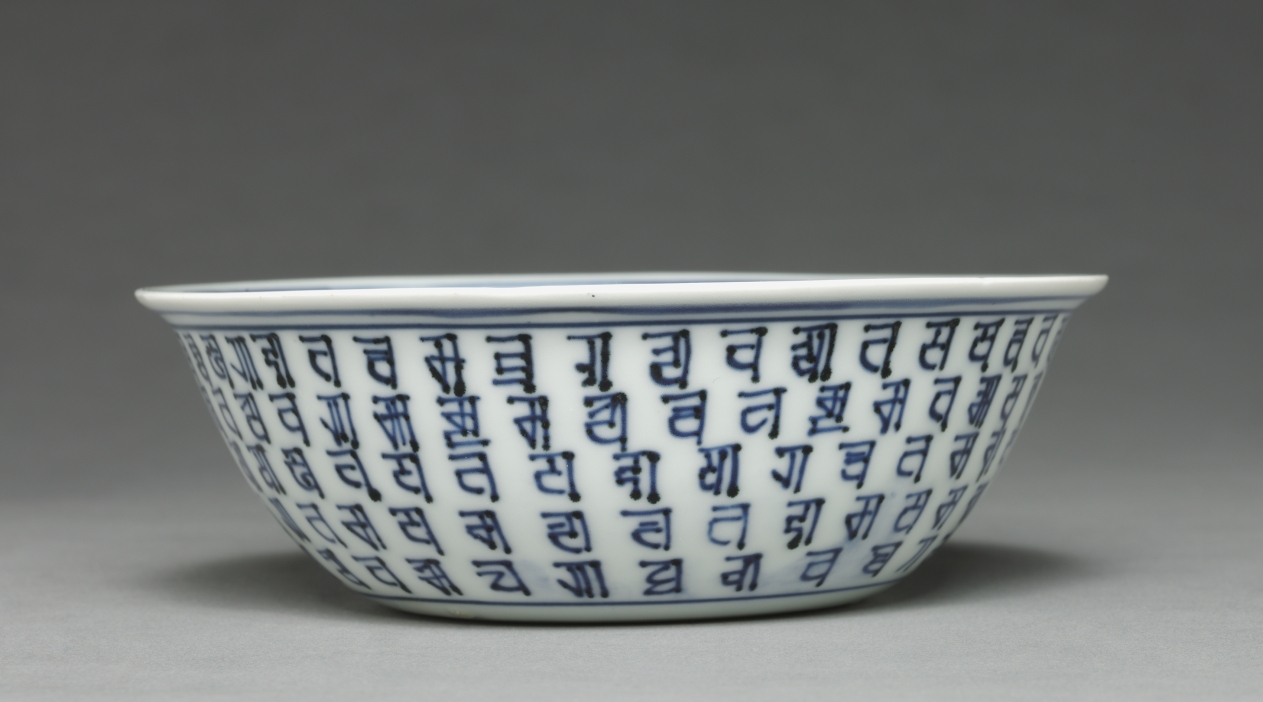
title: Bowl with Bands of Tibetan (Lança) Characters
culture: China, Jiangxi province, Jingdezhen kilns, Ming dynasty (1368-1644), Wanli mark and reign (1573-1619)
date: 1572–1620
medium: porcelain with underglaze blue decoration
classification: Ceramic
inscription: 大明萬曆年製